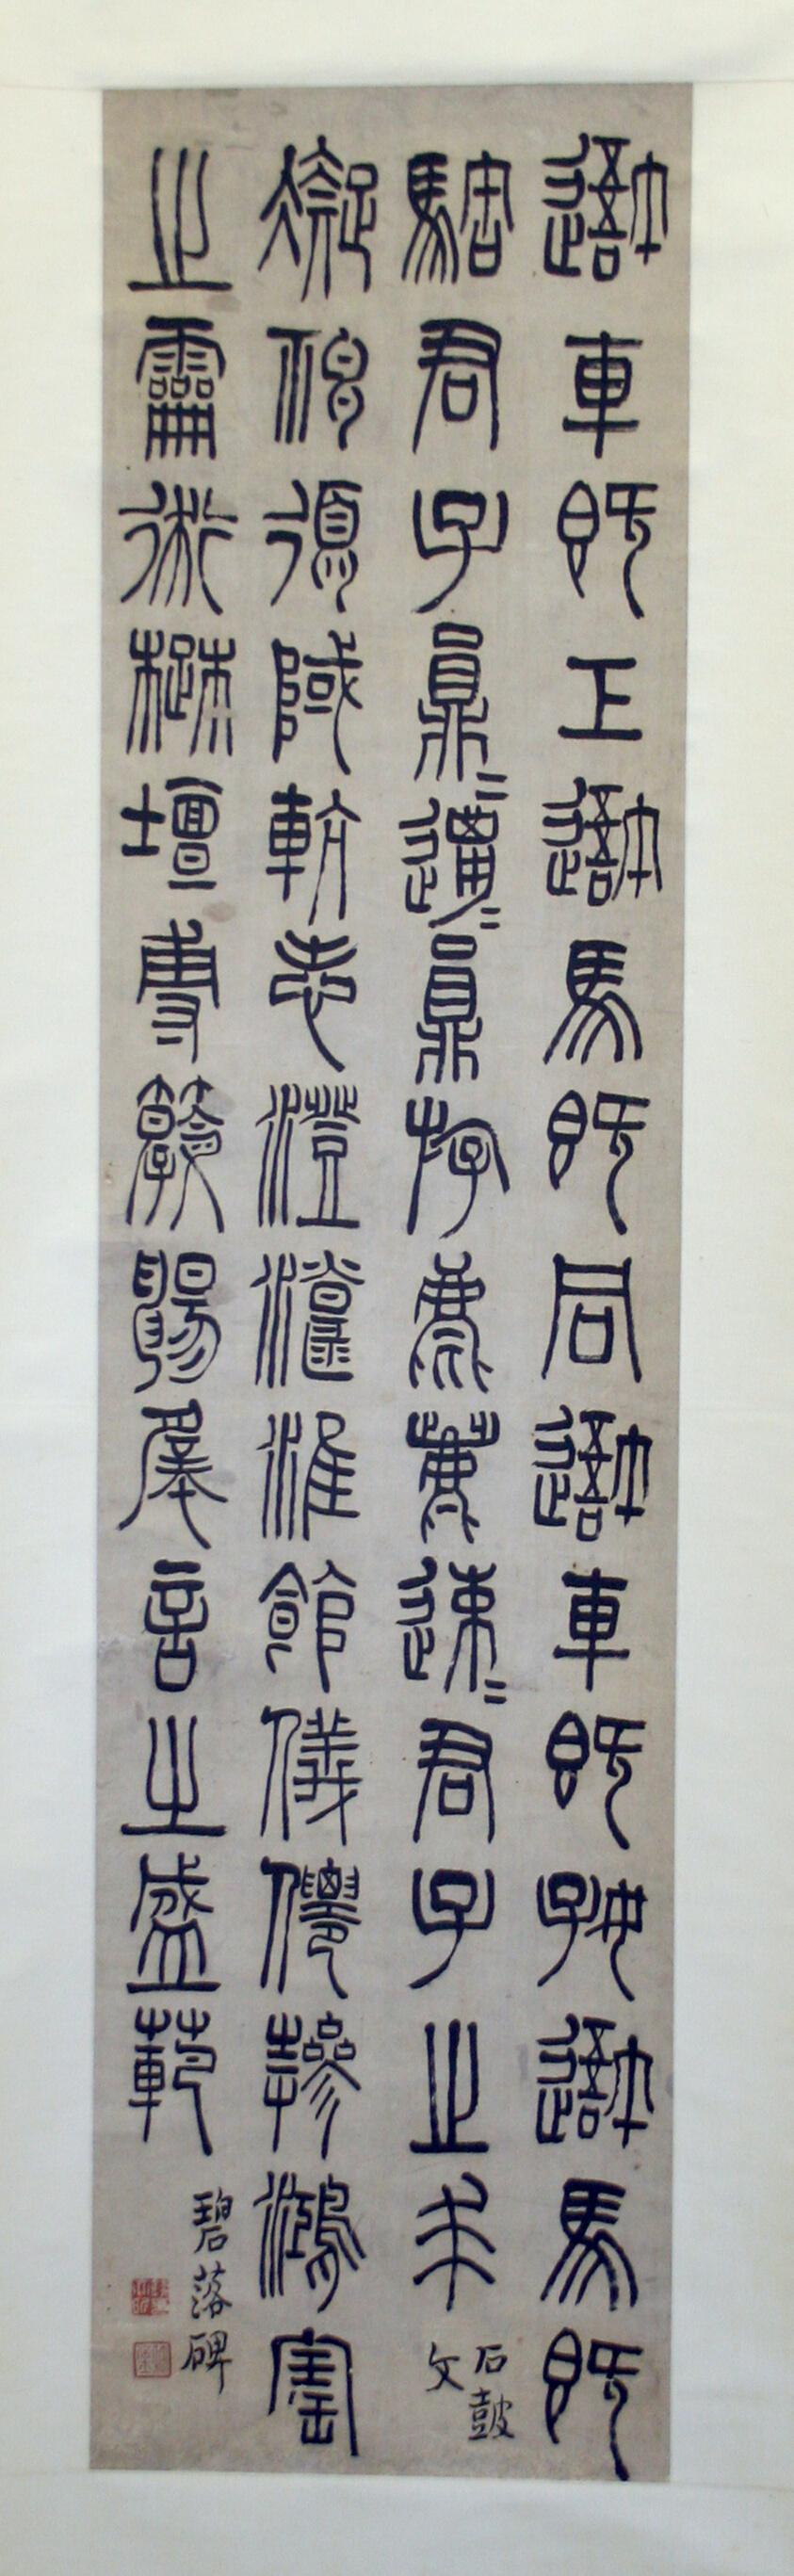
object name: Painting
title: Inscription on the Stone Drums, and the Bilou Stele: Calligraphy in Seal Script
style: Chinese (culture or style)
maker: Qian Daxin (Chinese, 1728-1804)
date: Qing dynasty (1644–1911)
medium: Hanging scroll; ink on paper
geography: Northern China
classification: hanging scroll; painting